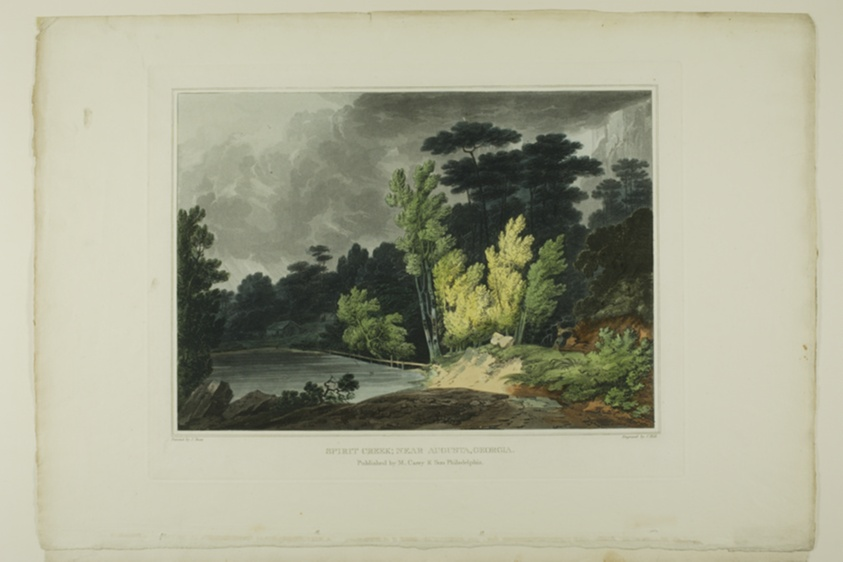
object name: Print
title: Spirit Creek; Near Augusta, Georgia, plate two of the second number of Picturesque Views of American Scenery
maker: John Hill (American, 1770-1850); after Joshua Shaw (American, born England, c. 1777-1860); published by Matthew Carey & Son (American, active 1795-1821)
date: 1819/21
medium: Aquatint with etching and hand-coloring on cream wove paper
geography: United States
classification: aquatint; portfolio; prints and drawing; print